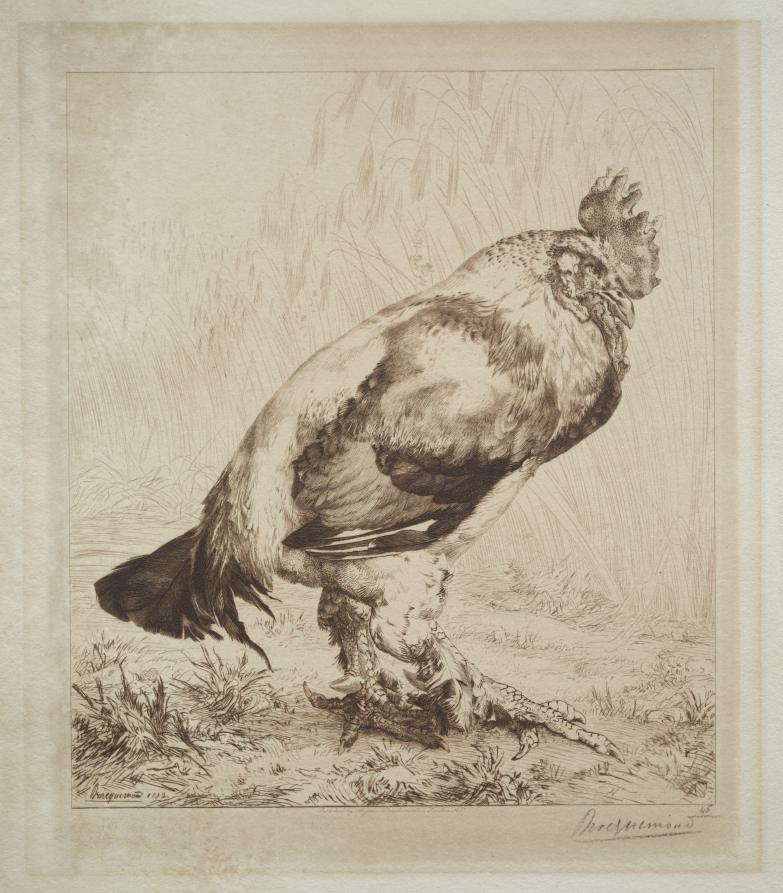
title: The Old Cock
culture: France, 19th century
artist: Félix Bracquemond (French, 1833–1914)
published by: Messrs. Dowdeswell, London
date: 1882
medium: etching in brown ink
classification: Print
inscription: signed, lower right in black crayon, Braquemond; in graphite: 45